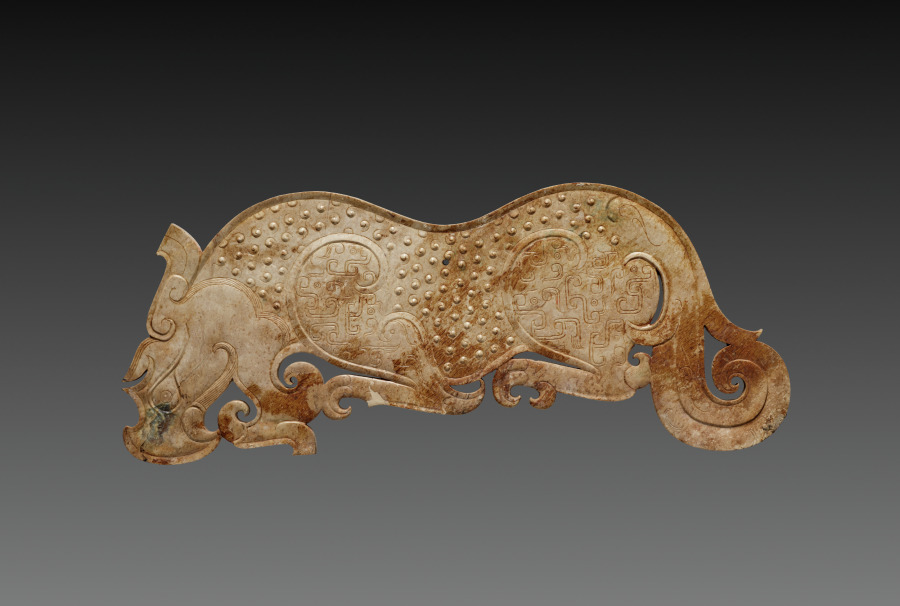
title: Jade Plaque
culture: China, Henan province, Eastern Zhou dynasty (770–256 BCE), Warring States period (475–221 BCE)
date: 475–221 BCE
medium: nephrite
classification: Jade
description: This beautiful pair of late Eastern Zhou openwork jade plaques illustrate a level of creativity and technical achievement that was unequaled before or since. Taking the shape of a pair of fantastic creatures, they are at once tigerlike, rhinolike, and dragonlike. Their strong silhouettes are marked with shallow relief bands, and their subtly swelling embellished surfaces are finished to the same degree on both sides.